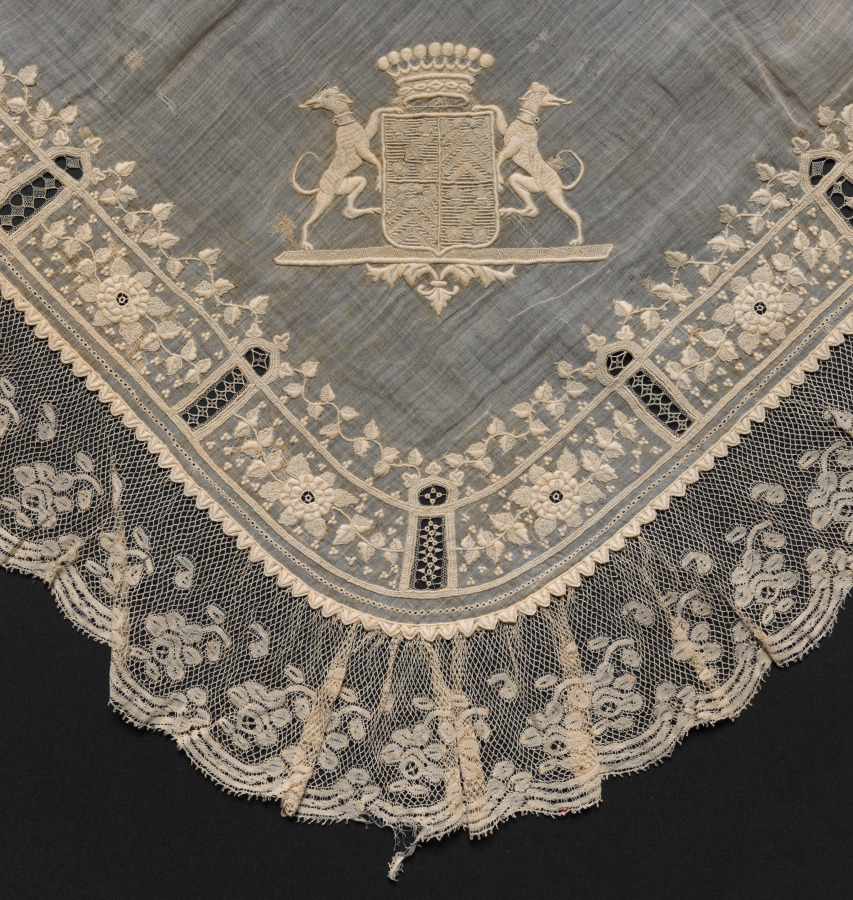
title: Lace Handkerchief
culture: France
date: 1800–1820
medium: Plain weave linen center: bobbin lace edging and embroidery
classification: Embroidery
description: There is a coat of arms embroidered in one corner of this lace handkerchief.